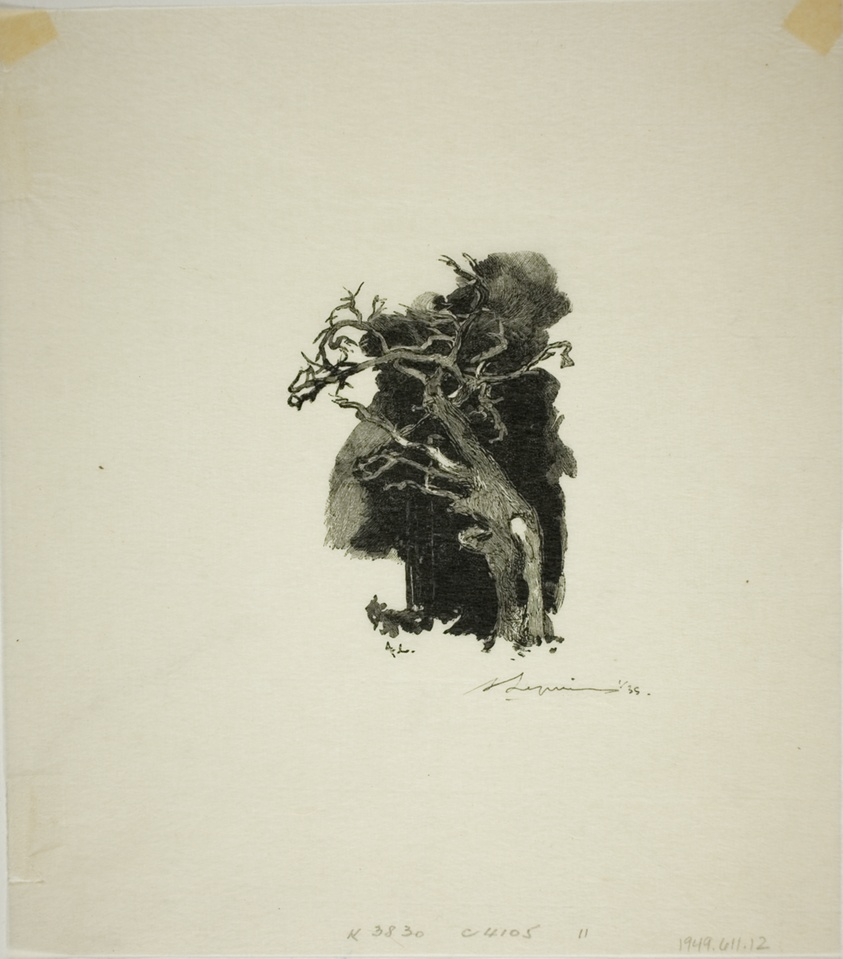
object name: Print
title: The Spitfire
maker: Louis Auguste Lepère (French, 1849-1918); published by A. Desmoulins (French, active c. 1908-1910)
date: published 1908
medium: Wood engraving in black on cream laid Japanese paper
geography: France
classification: wood engraving; print; prints and drawing